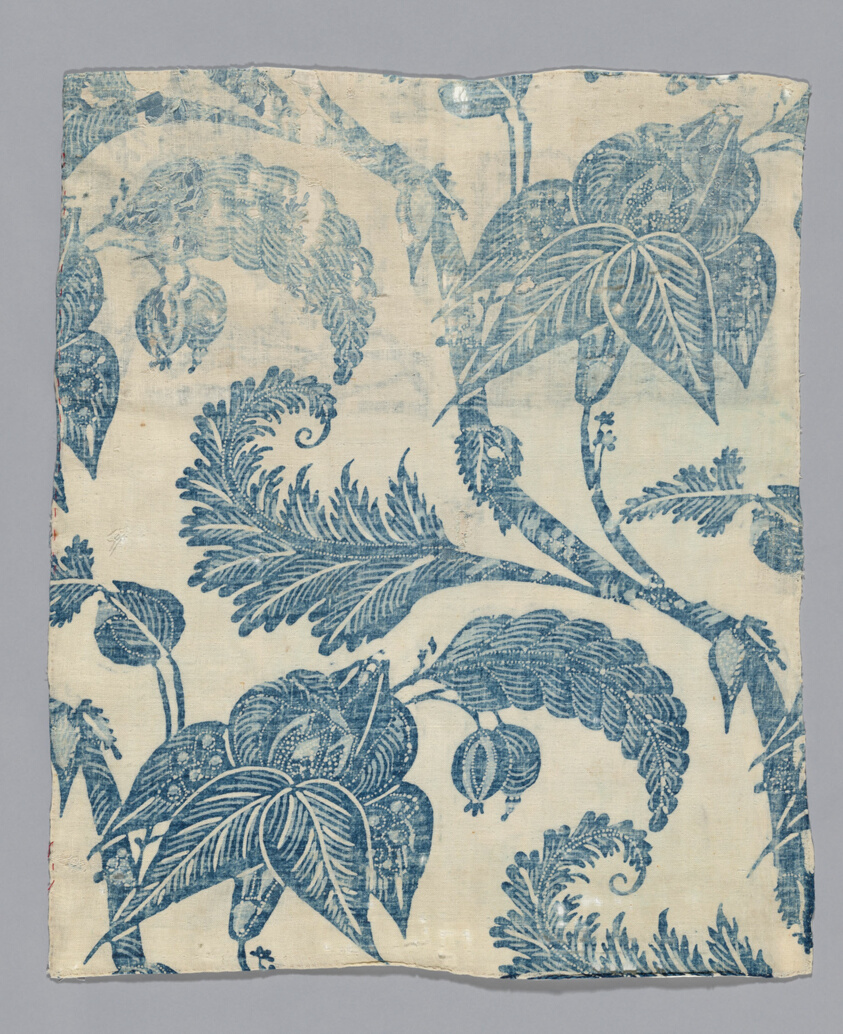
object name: Textile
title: Fragment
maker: United States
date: 1750/75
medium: Cotton, plain weave; block printed with overbleach resist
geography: United States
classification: textile; weaving - printed